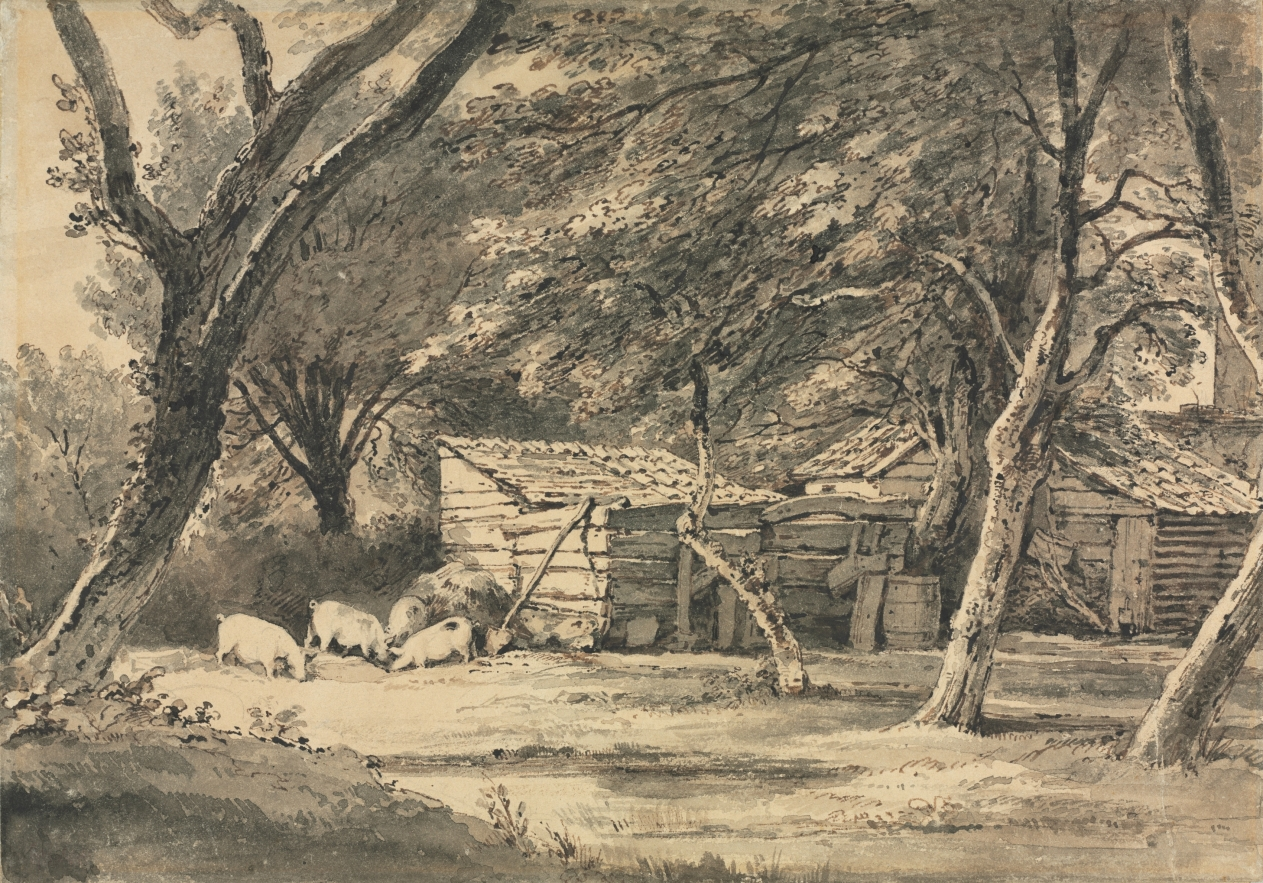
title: Farm with Pigs Foraging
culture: England, late 18th-early 19th century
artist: Henry Edridge (British, 1769–1821)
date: c. 1789–1821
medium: wash and graphite on paper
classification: Drawing